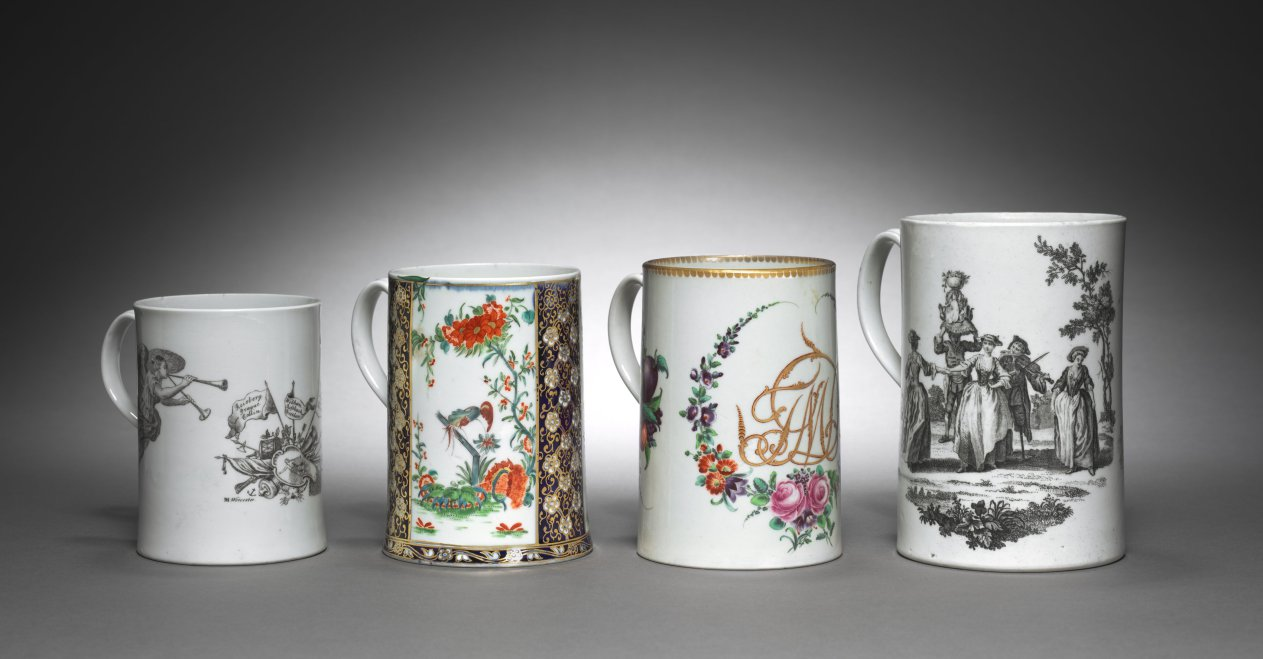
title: Cann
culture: England, 18th century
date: c. 1770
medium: ceramic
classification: Ceramic